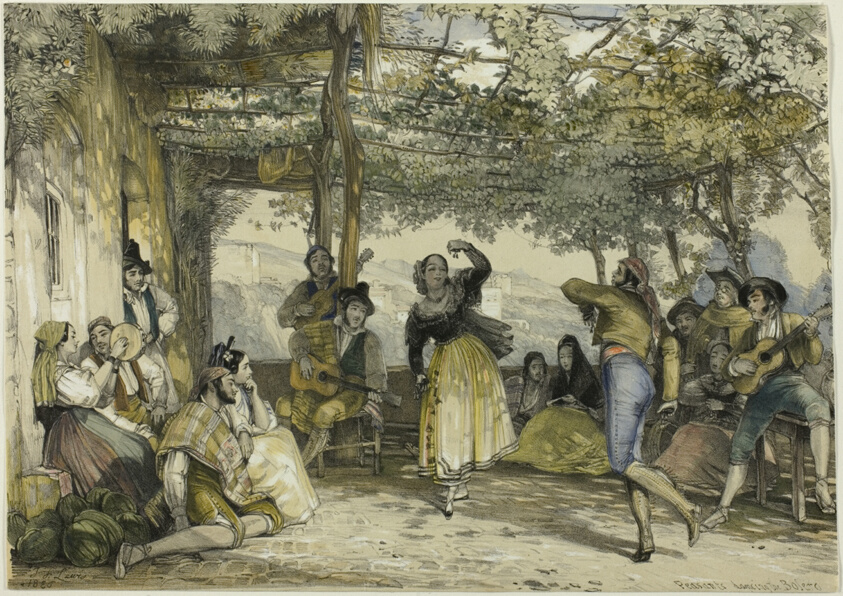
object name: Print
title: Spanish Peasants Dancing the Bolero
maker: John Frederick Lewis (English, 1805-1876)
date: 1836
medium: Lithograph in colors with additional hand- coloring on ivory wove paper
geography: England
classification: lithograph; print; prints and drawing